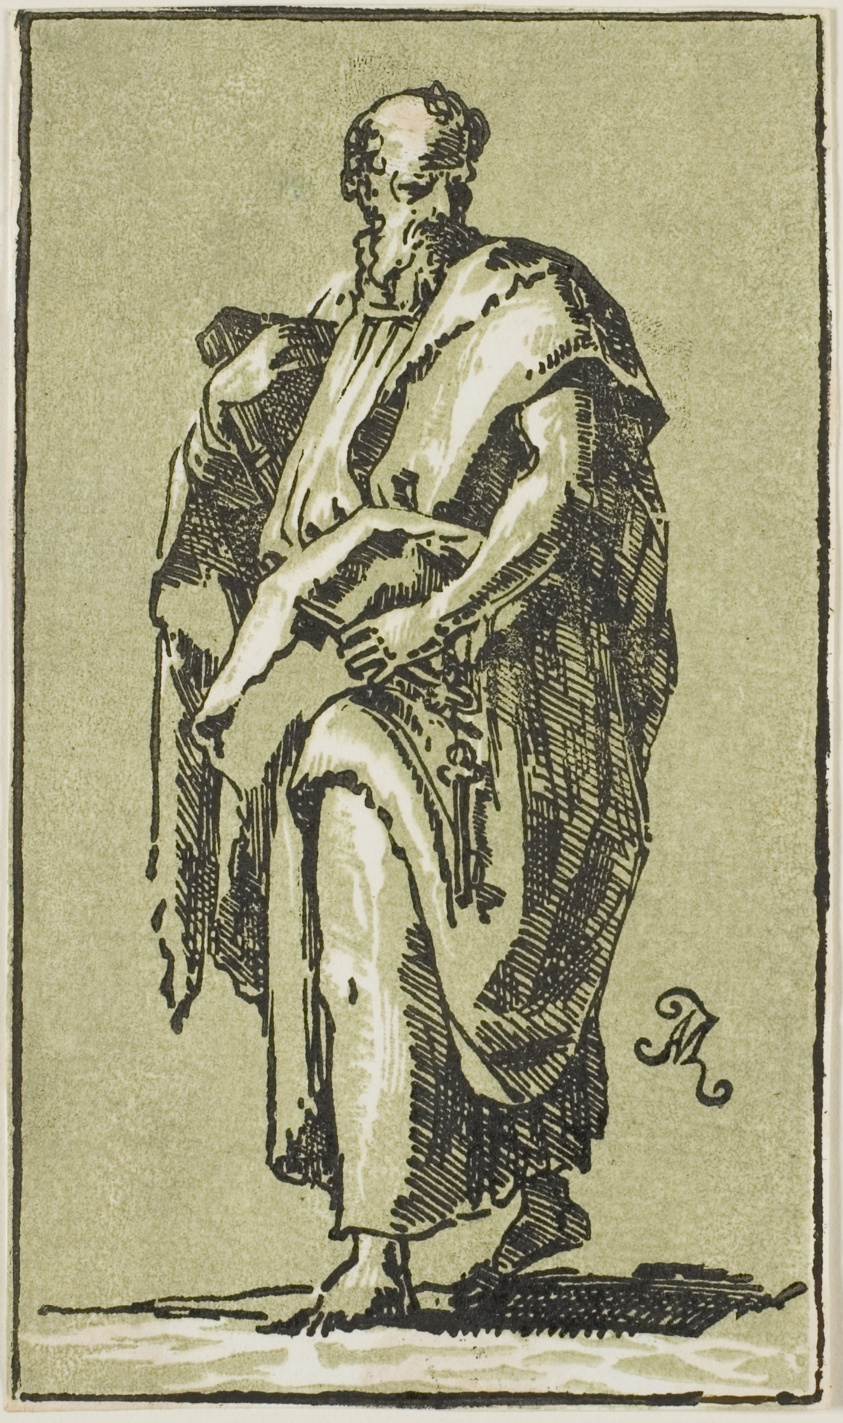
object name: Print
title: St. Peter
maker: Conte Anton Maria Zanetti; Italian, 1680–1767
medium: Chiaroscuro woodcut in green and black on off-white laid paper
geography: Italy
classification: woodcut; print; prints and drawing